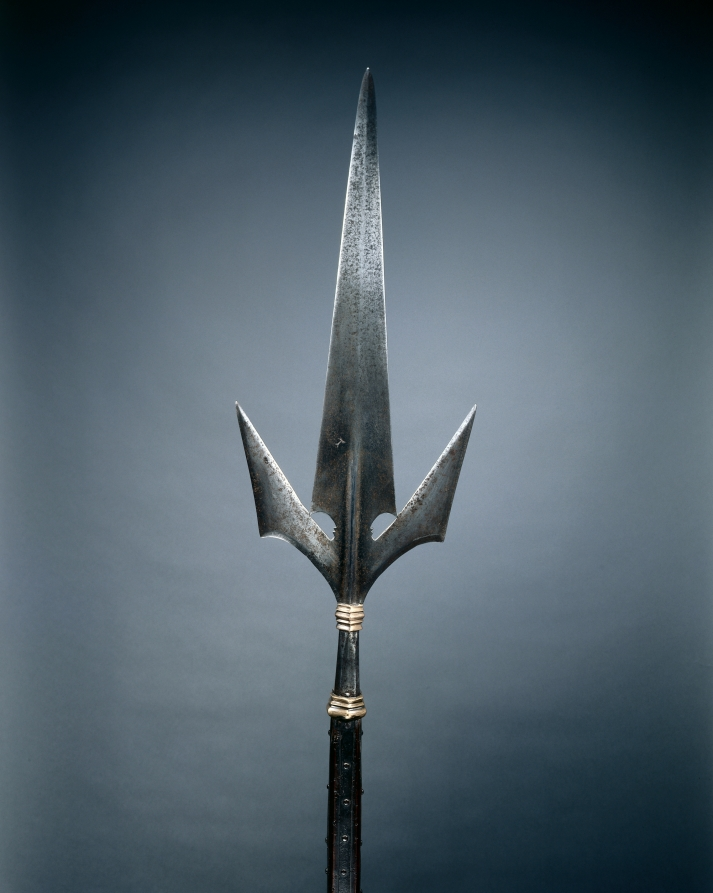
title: Corsèque (Chauve-Souris)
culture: North Italy, 16th century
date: c. 1530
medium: steel, square wood haft with planed corners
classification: Arms and Armor